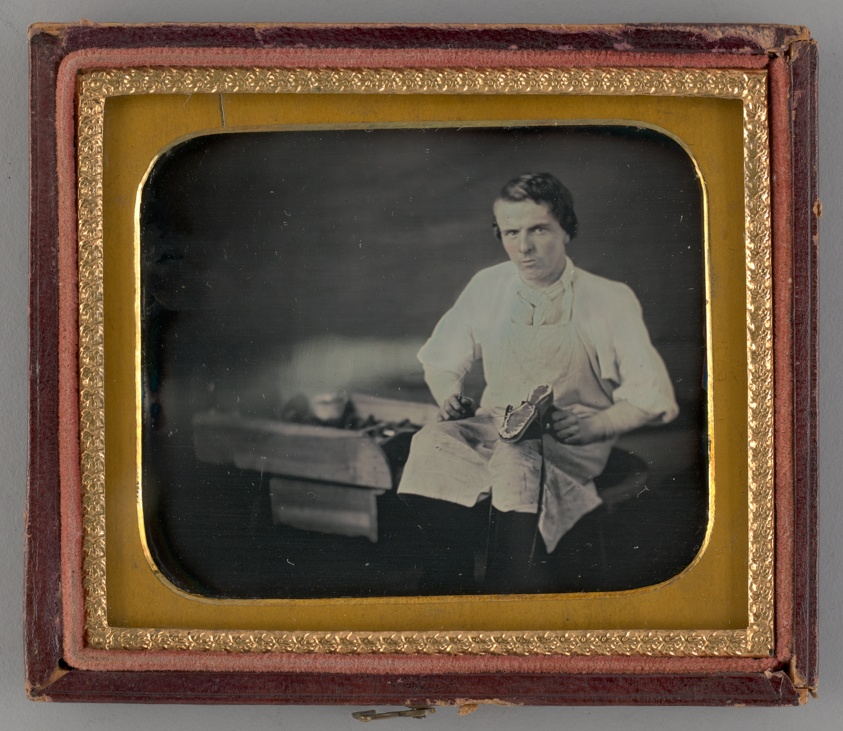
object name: Photograph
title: Untitled (Portrait of a Cobbler)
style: 19th century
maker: Unknown maker; American, 19th century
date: 1853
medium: Daguerreotype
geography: United States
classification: portrait; photographic process; photography; photograph; daguerreotype; portrait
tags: lundberg collection, Male, shoes, men, portrait, portraits, portraits: male subject